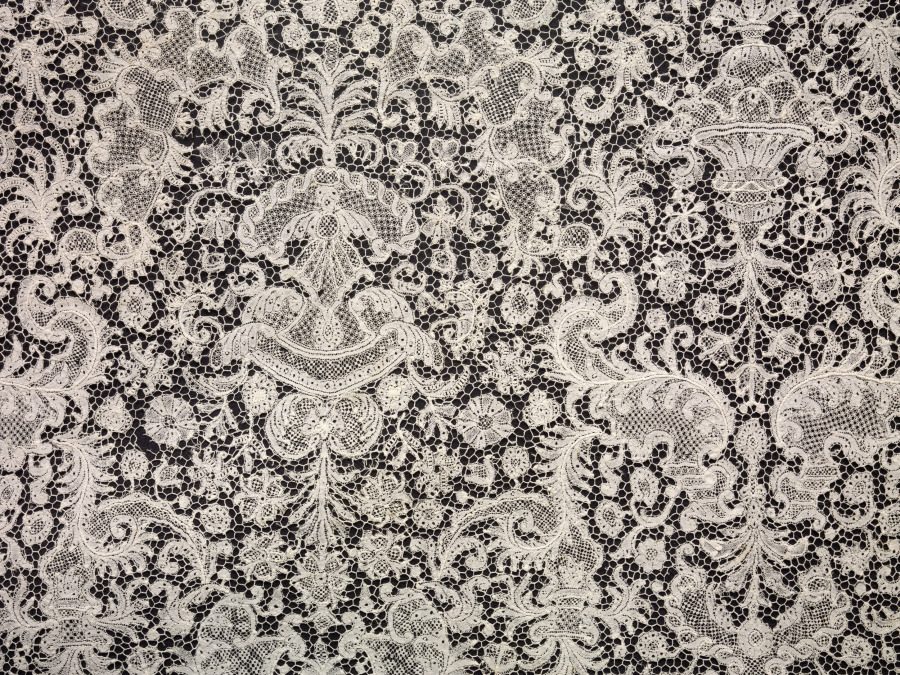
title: Lace Jabot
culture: Flanders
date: 1600s-1700s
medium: Bobbin lace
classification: Lace